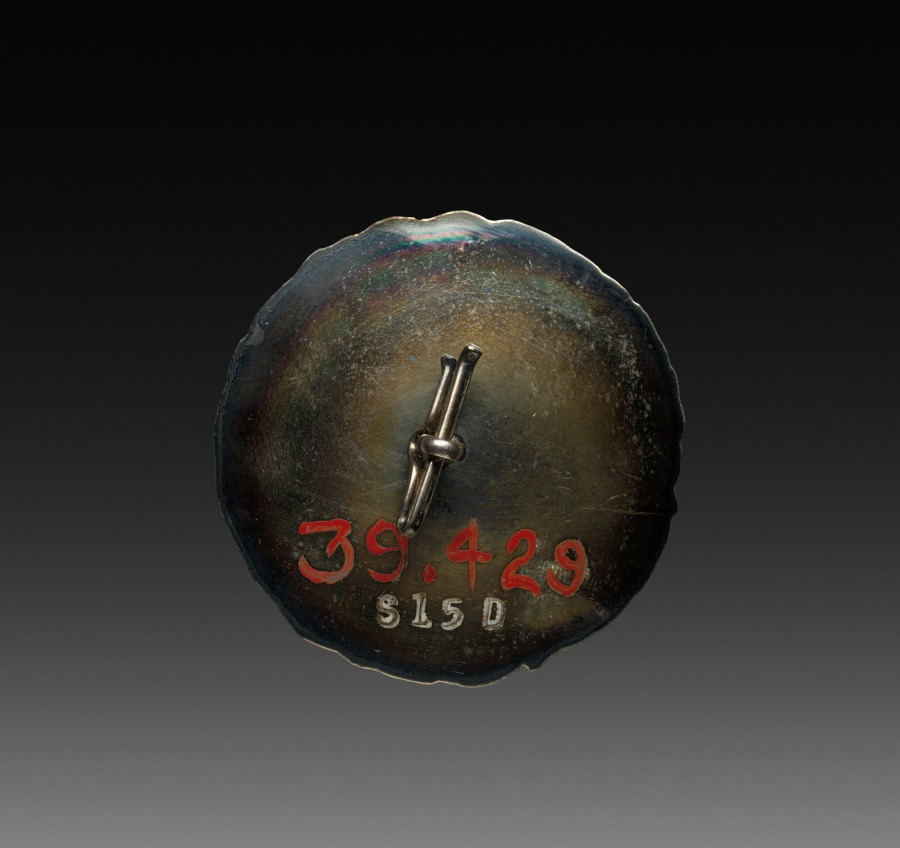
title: Button with Dragon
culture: Japan, Meiji period (1868–1912) or Taishō period (1912–26)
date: early 1900s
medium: cast (?) silver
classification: Metalwork